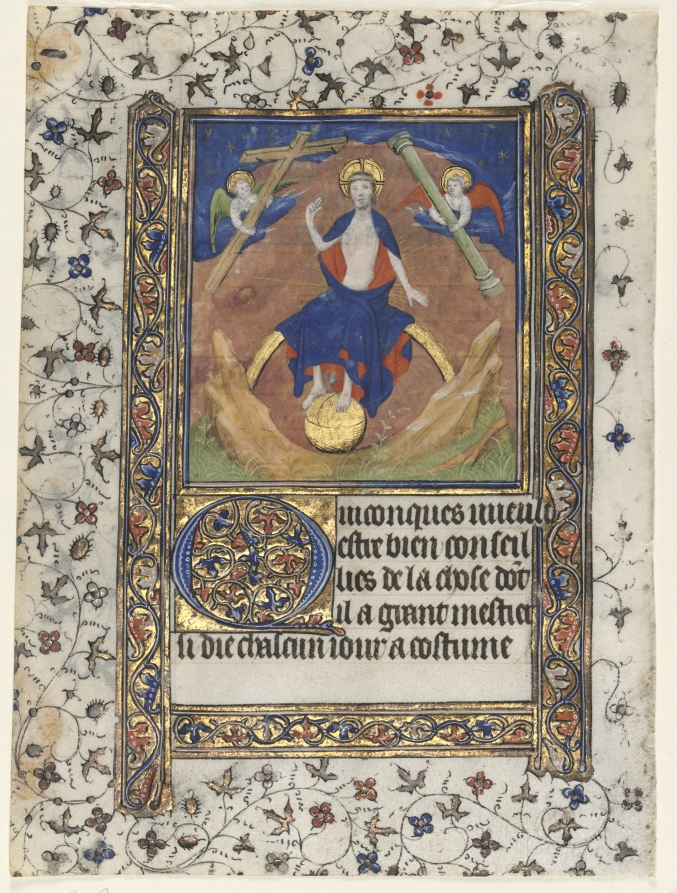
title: Leaf from a Book of Hours: Christ in Judgment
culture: France, Paris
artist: workshop of Boucicaut Master (French, Paris, active about 1410–25)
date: c. 1415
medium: ink, tempera, and gold on vellum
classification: Manuscript